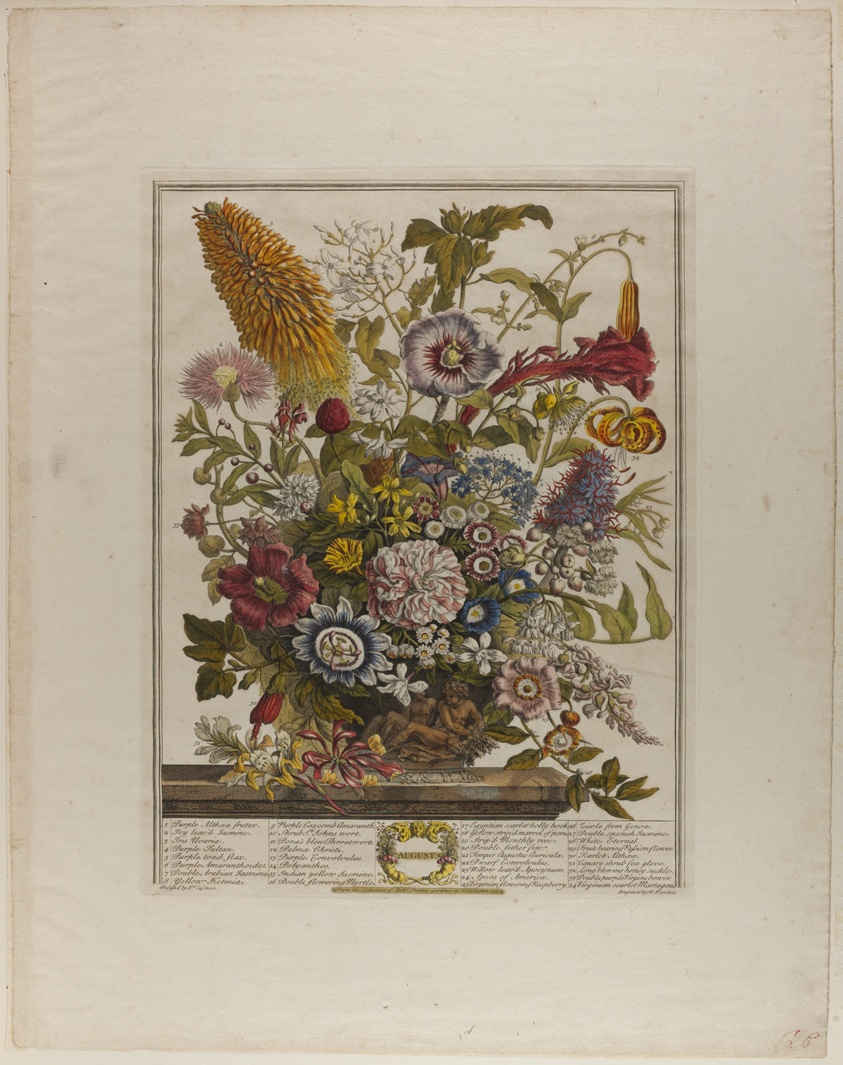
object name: Print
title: August, from Twelve Months of Flowers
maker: Henry Fletcher (English, 1710-1750); after Peter Casteels III (Flemish, 1684-1749)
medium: Engraving in black ink with opaque and translucent watercolor on cream laid paper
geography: England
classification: etching; print; prints and drawing